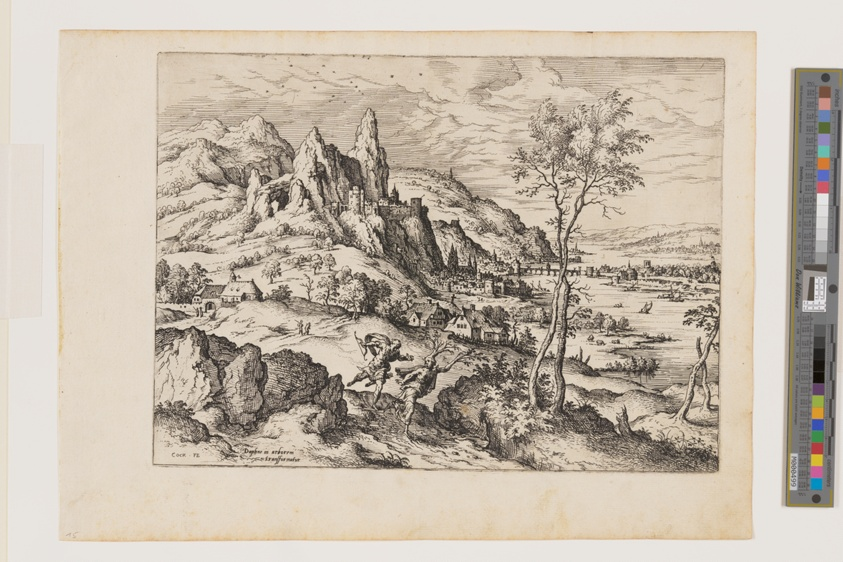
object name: Print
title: Daphne Persecuted by Apollo, from Landscapes with Biblical and Mythological Scenes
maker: Hieronymus Cock (Netherlandish, c. 1510–1570); after Matthys Cock (Netherlandish, c. 1505-1548)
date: 1558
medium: Etching on ivory laid paper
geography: Netherlands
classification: etching; paper; print; prints and drawing